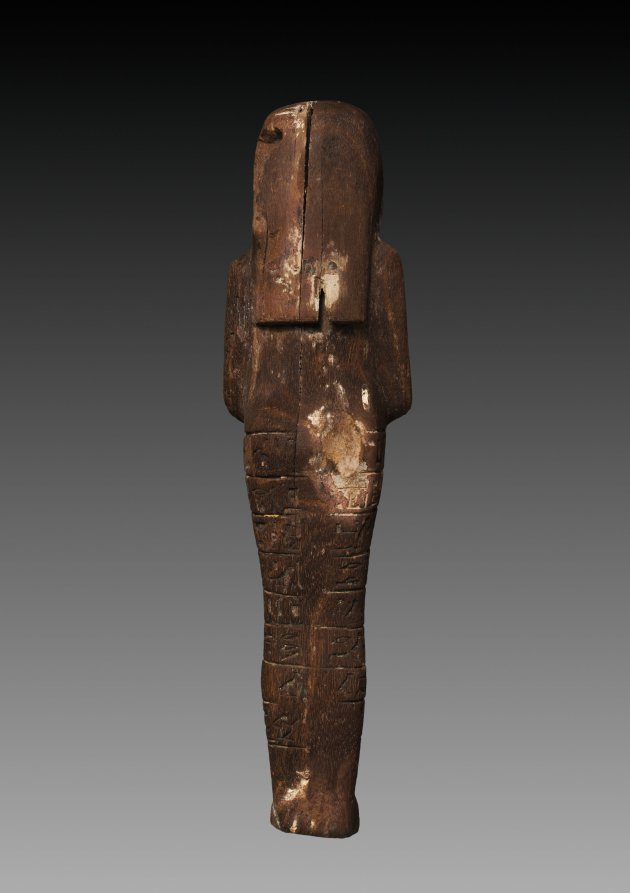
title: Shawabty of the Scribe Seti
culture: Egypt, New Kingdom (1540–1069 BCE), Dynasties 18–19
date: 1350–1250 BCE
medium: painted wood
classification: Funerary Equipment